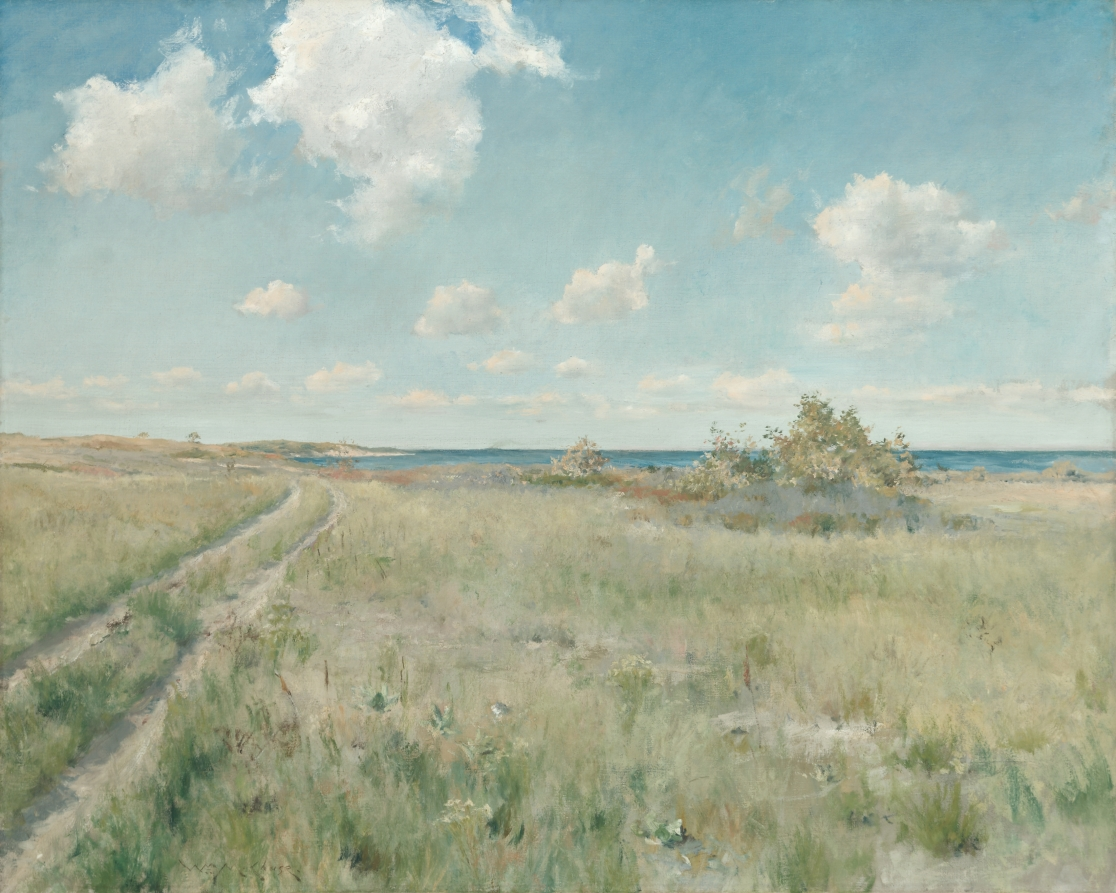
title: The Old Road to the Sea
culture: America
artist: William Merritt Chase (American, 1849–1916)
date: c. 1893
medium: oil on canvas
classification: Painting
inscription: signed lower left: WM M. Chase [WM in monogram]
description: One of the most influential of the American Impressionists, William Merritt Chase established his own summer school at Shinnecock, on the eastern tip of Long Island, New York. Attracted to the low-lying dunes and beaches, Chase and his students were among the first American artists to pursue open-air painting. With its varied brushwork and warm colors, this painting is among the finest works Chase produced at Shinnecock. The panoramic scene glows with the light of a summer day. The Chase school at Shinnecock, active from 1891-1902, was instrumental in expanding the influence of Impressionism in the United States.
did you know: Chase loved big dogs, variously owning a greyhound, a borzoi, and an Irish wolfhound.